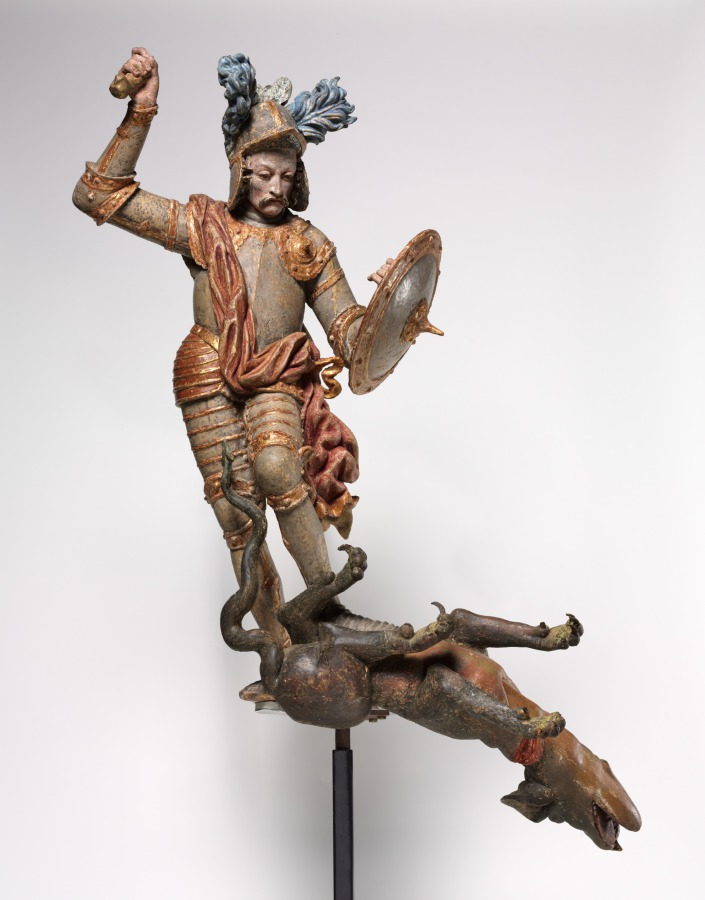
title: Saint George and the Dragon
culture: South Germany or Austria, late 17th century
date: late 1600s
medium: painted and gilded wood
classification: Sculpture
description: Saint George, a Roman soldier martyred for his Christian faith, is best known for slaying a fearsome dragon that terrorized the city of Silene, in Libya. George offered to kill the monster if residents of the city convert to Christianity. Here, George stands triumphantly over the dragon, writhing as it dies. The artist deliberately incorporated features intended to make his figure seem more familiar: the dragon seems more canine than reptilian, while George wears armor from the recent past and bears almost portrait-like facial features.